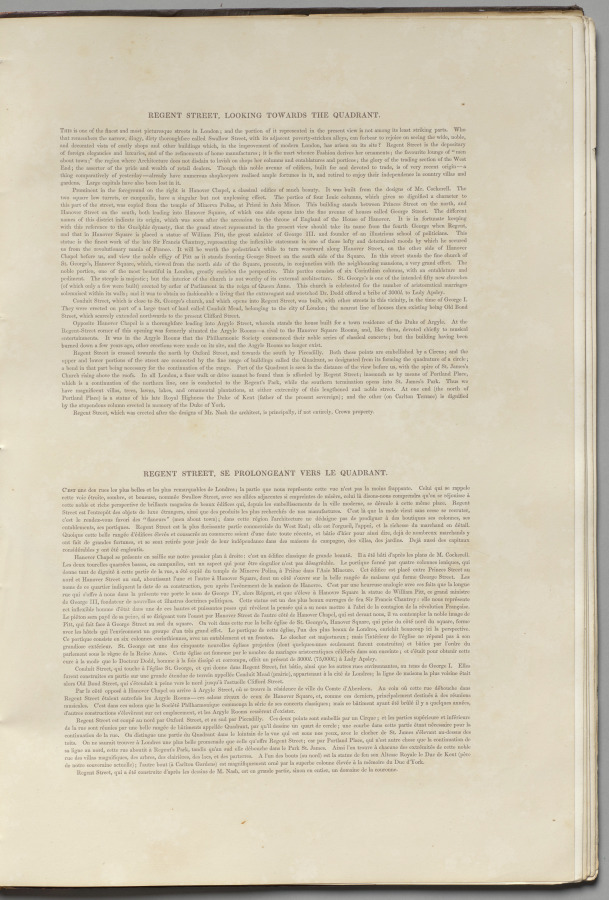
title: London As It Is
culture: England, 19th century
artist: Thomas Shotter Boys (British, 1803–1874)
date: 1842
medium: lithograph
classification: Bound Volume